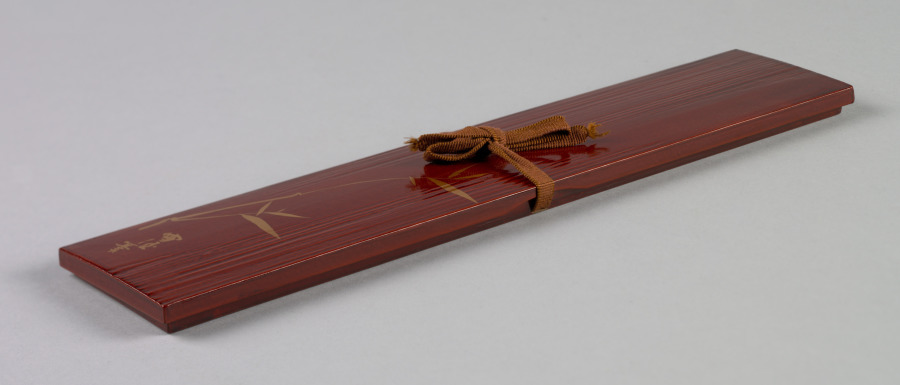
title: Poem Card Box with Lid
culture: Japan, Meiji period (1868–1912)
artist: Kamisaka Sekka (Japanese, 1866–1942)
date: 1868–1912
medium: wood with lacquer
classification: Lacquer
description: Long, decorated cards for the calligraphic presentation of poems are called tanzaku in Japanese. This box is a collaboration between the designer Kamisaka Sekka and the lacquer artist Iwamura Sadazō. Together, they crafted this box with a golden bamboo lid, and filled it with cards decorated with gold leaf designs.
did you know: Poems written on long poetry cards, or tanzaku, are often collected into albums called tekagami in Japanese.